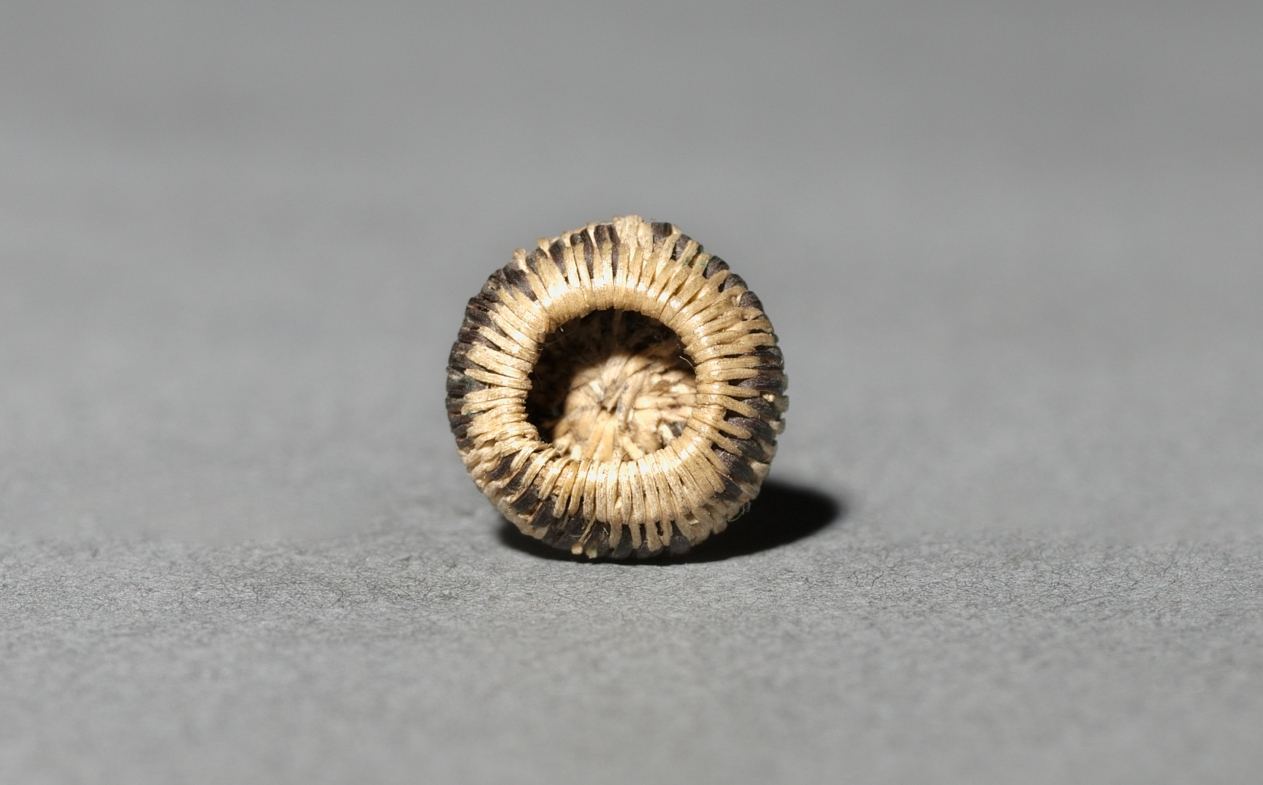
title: Miniature Round Basket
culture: California, Pomo, 20th century (?)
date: early 1900s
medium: coiled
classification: Basketry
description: Miniature baskets were made to demonstrate the basket maker’s virtuoso skill; these tiny marvels seem to be no exception—the smallest are just a few millimeters wide but still patterned. Such fine work required dexterity both in weaving and in harvesting and preparing the plant materials used to create the basket.